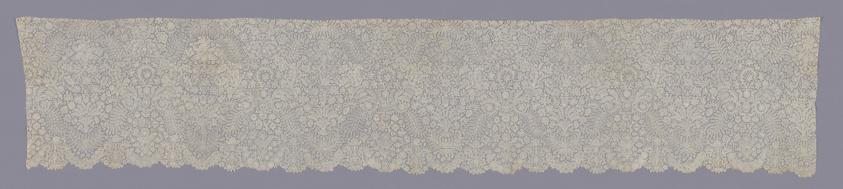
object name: Textile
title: Lace Flounce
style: 18th Century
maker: Brussels, Flanders (present day Belgium)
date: 1720–40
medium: Linen, bobbin part-lace of a type known as "Brussels" with a plaited bar ground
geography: Flanders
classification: textile; lace - bobbin; costume - lace